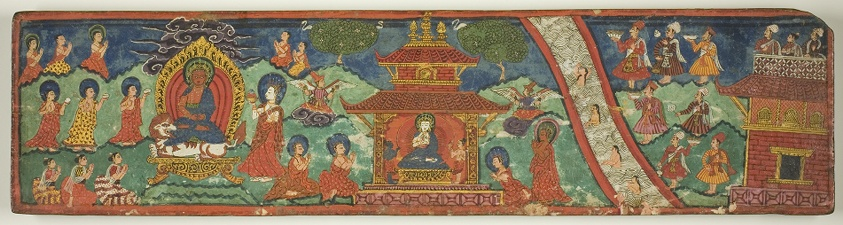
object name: Religious/Ritual Object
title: One of a Pair of Magical Charms (Dharani) Manuscript Covers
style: Himalayan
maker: Nepal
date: 18th century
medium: Pigment and metallic paint on wood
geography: Nepal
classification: manuscript; wood; ritual objects